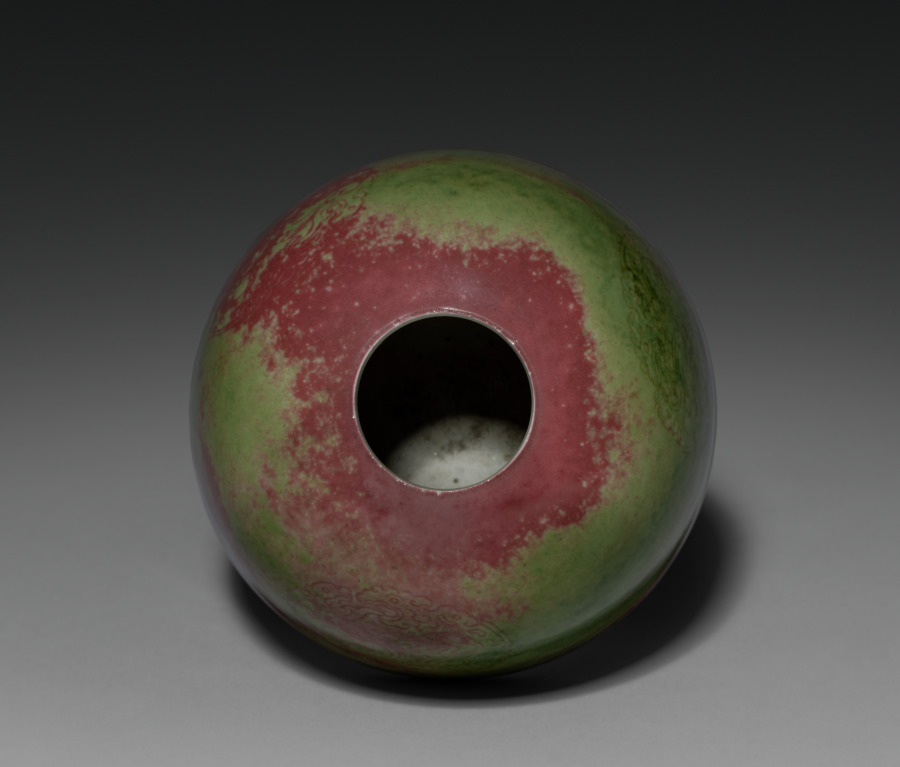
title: Water Pot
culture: China, Jiangxi Province, Jingdezhen, Qing dynasty (1644–1911), Kangxi period (1662–1722)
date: 1662–1722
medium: porcelain with "peach bloom" glaze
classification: Ceramic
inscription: 大清康熙年制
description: The "peach-bloom" glaze developed during the Kangxi era has been described as "drunken with beauty." The water pot's glaze is in shades ranging from red to grayish rose. The interior and base are covered in white glaze.